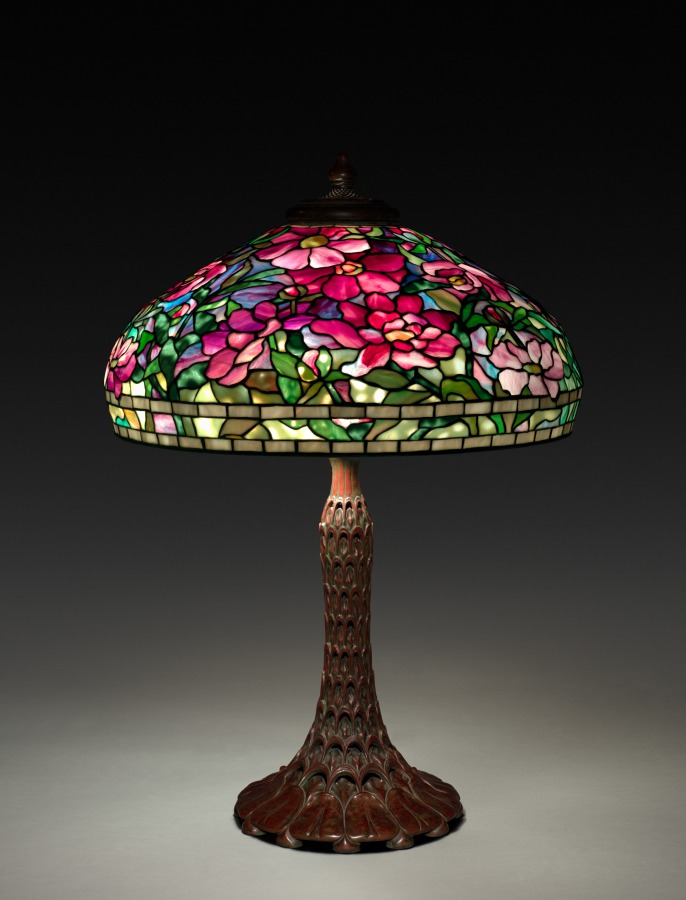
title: Peony Table Lamp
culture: America, New York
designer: probably by Clara Wolcott Driscoll (American, 1861–1944)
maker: Tiffany Studios (United States, New York, 1902–32)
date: c. 1902–10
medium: Leaded glass, bronze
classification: Lamp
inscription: Shade impressed: TIFFANY STUDIOS NEW YORK 355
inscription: Base impressed: TIFFANY STUDIOS/NEW YORK/542/ 2574 [scratched]